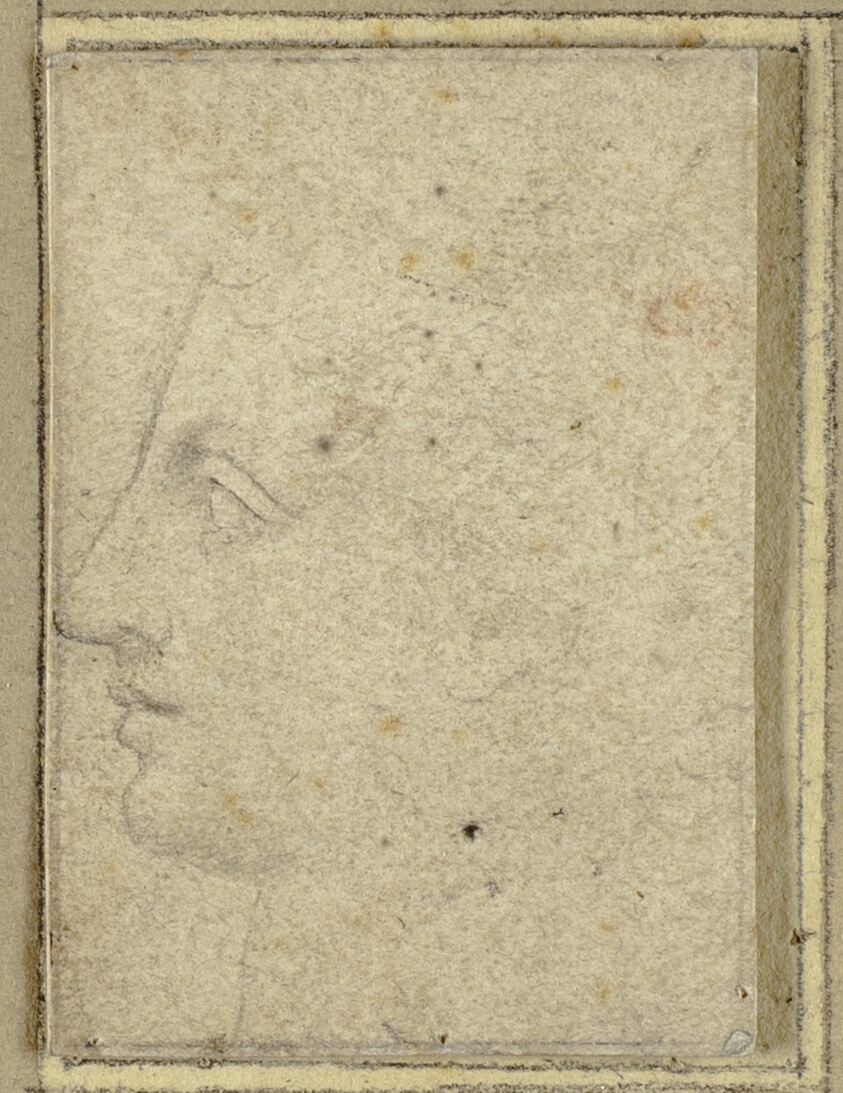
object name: Drawing and Watercolor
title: Head of a Youth in Profile to Left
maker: Unknown Artist; Italian, early 16th century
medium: Black chalk on buff laid paper, tipped on to card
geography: Italy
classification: chalk; drawings (visual works); prints and drawing